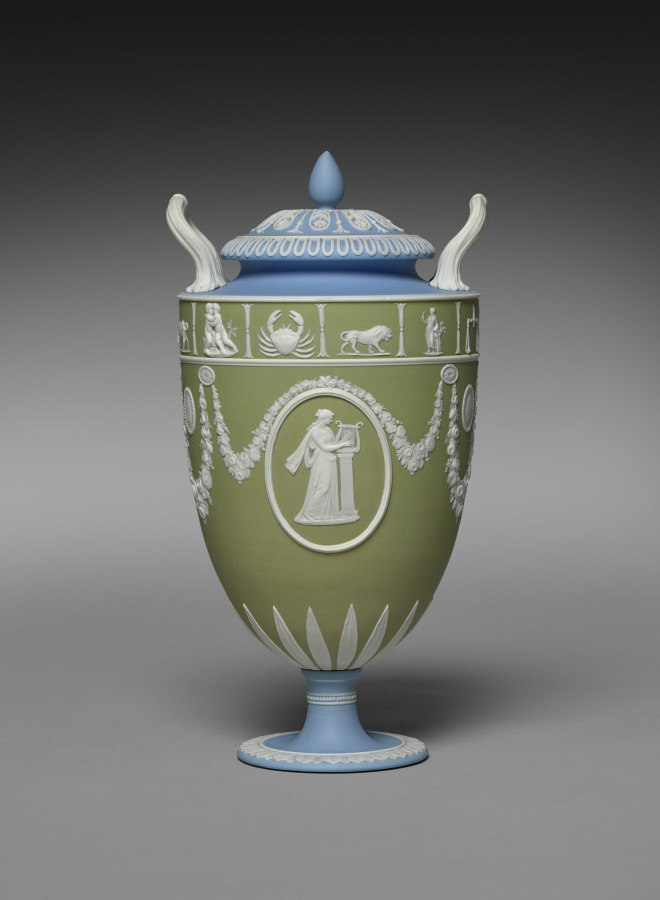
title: Covered Vase (one of a pair)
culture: England, Staffordshire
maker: Josiah Wedgwood and Sons (British, Staffordshire, est. 1759)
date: c. 1850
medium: jasper ware with relief decoration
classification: Ceramic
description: Wedgwood's tricolor jasperware first became popular in the 1770s during a period of fascination with neoclassical decoration. This vase was probably made around 1850 during the period when this type of decoration was revived. The relief medallions depict two versions of the Greek god Apollo, the god of music, next to his harp or lyre.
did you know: Signs of the zodiac form a decorative border around the upper portion of this vase.